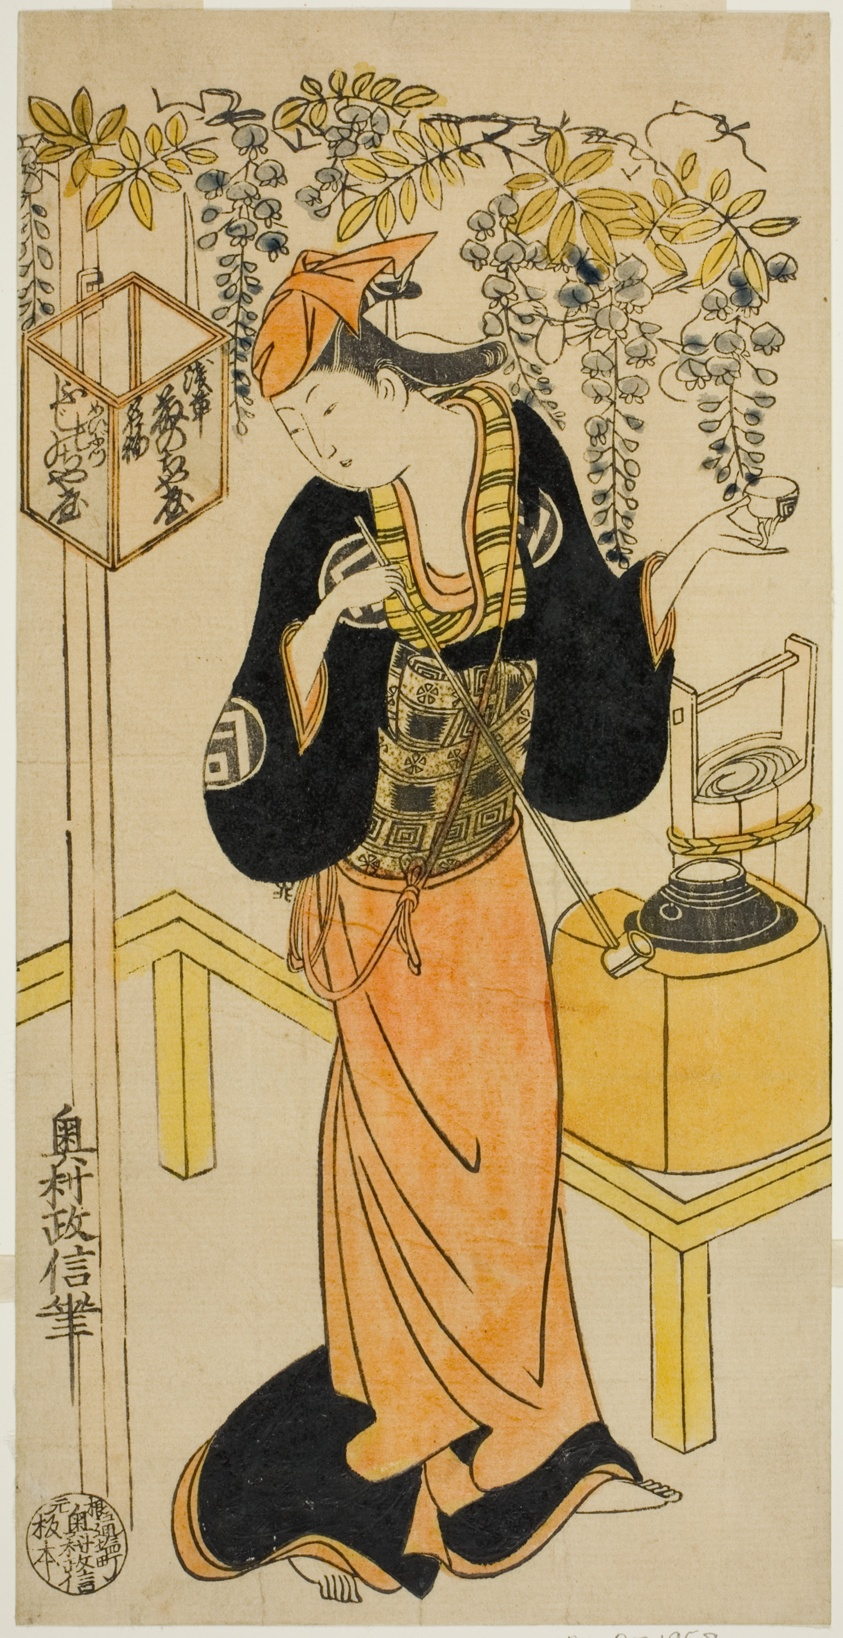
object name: Print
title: The Actor Sanogawa Mangiku I as Ohatsu in the play "Sogazaki Shinju," performed at the Nakamura Theater in the fourth month, 1719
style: Japanese (culture or style)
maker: Okumura Masanobu (Japanese, 1686-1764)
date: 1719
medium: Hand-colored woodblock print; hosoban, urushi-e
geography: Japan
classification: woodblock print; print; asian art